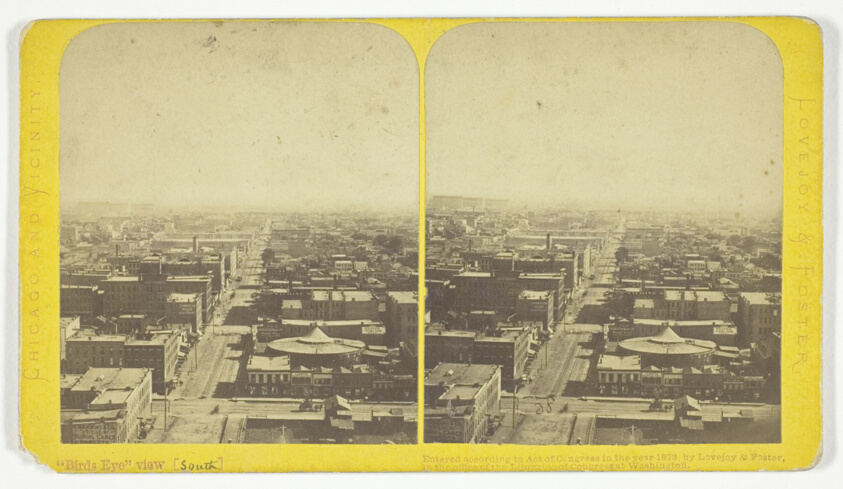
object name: Photograph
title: Bird's Eye View (South), from the series "Chicago and Vicinity"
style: 19th century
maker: Lovejoy & Foster; American, active 1870s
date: 1873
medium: Toned gelatin silver print, stereo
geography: United States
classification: photograph; photography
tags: Chicago